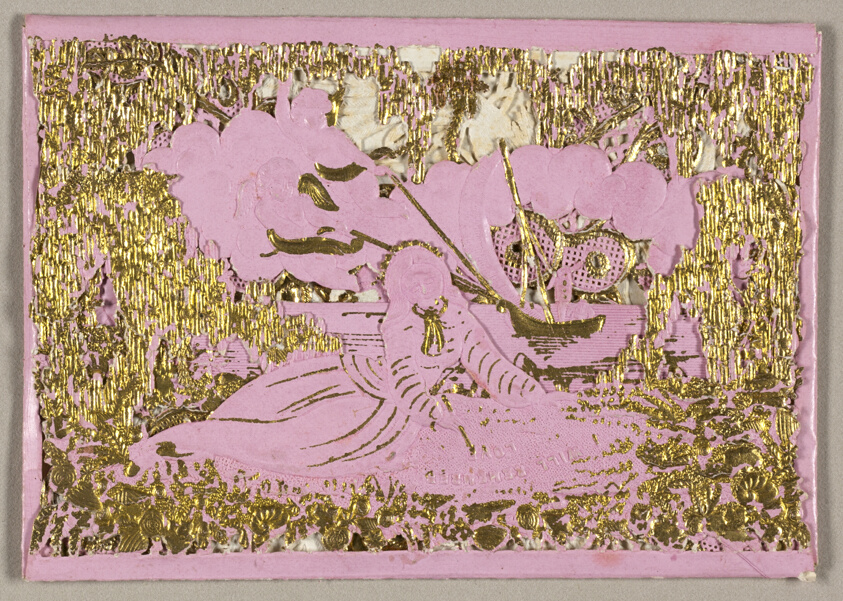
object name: Drawing and Watercolor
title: I Will Remember Love (valentine)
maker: John Windsor (English, 19th century)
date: 1860/69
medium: Gold and pink paint on cut and embossed (designed) ivory wove paper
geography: England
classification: collage; valentine; prints and drawing; paper